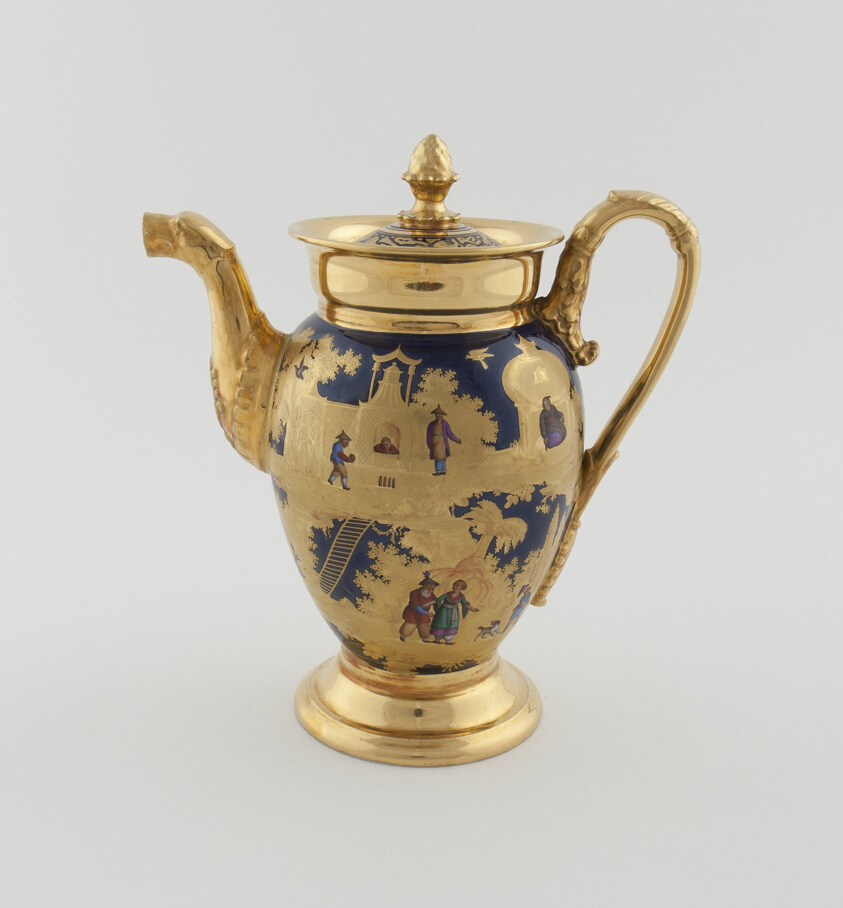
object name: Ceramics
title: Teapot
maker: Denuelle Porcelain Manufactory (French, 1818-1829)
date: c. 1820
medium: Hard-paste porcelain, polychrome enamels, and gilding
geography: Paris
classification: teapot; porcelain; ceramics